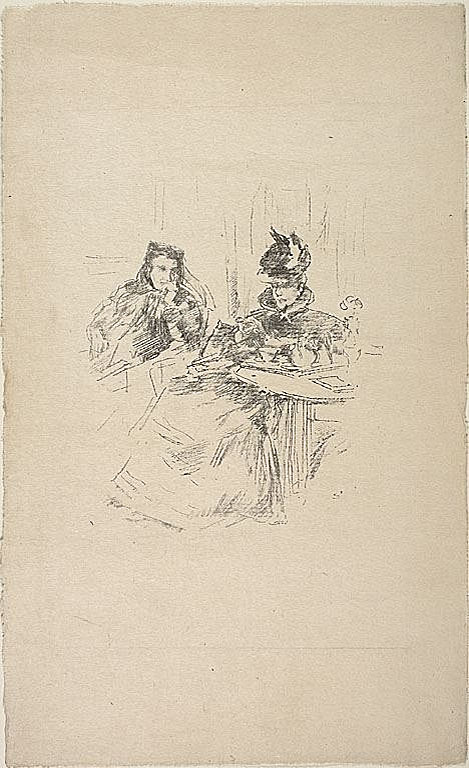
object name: Print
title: Afternoon Tea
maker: James McNeill Whistler (American, 1834-1903)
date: 1897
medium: Transfer lithograph in black on tan laid Japanese vellum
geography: United States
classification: transfer lithograph; lithograph; print; prints and drawing